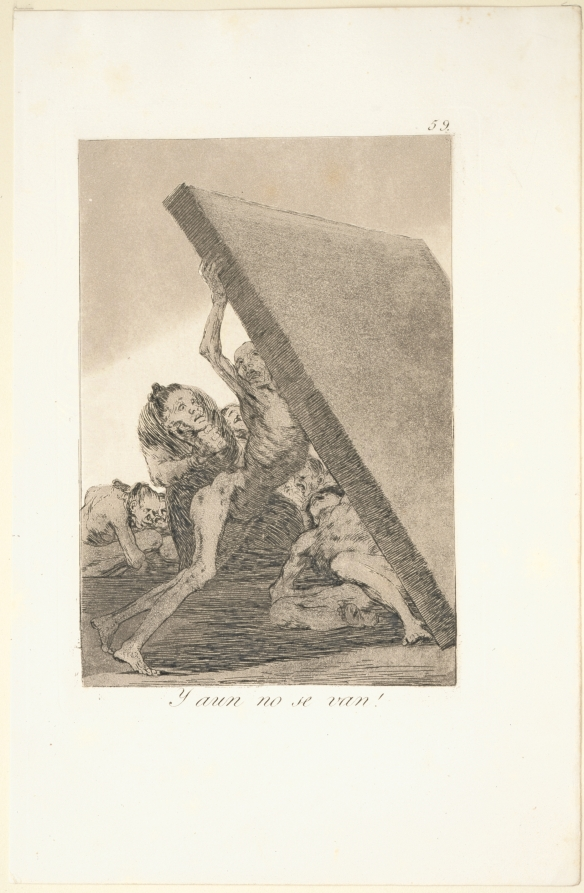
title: And Still They Don't Go!, Plate 59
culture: Spain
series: Los Caprichos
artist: Francisco de Goya (Spanish, 1746–1828)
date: 1799, printed c. 1855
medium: etching and aquatint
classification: Print